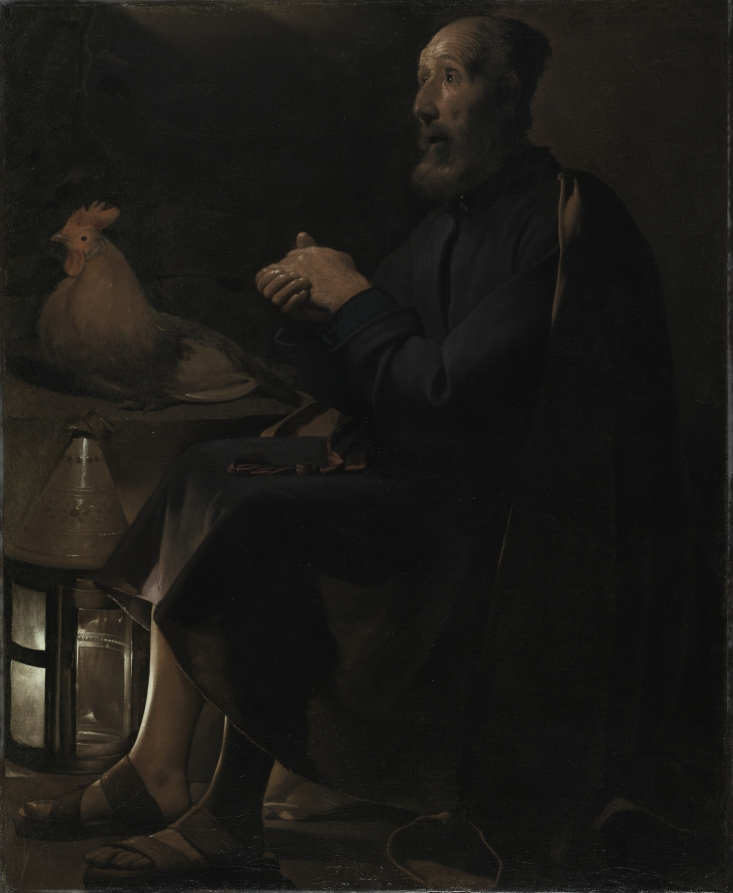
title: Saint Peter Repentant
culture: France, 17th century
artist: Georges de La Tour (French, 1593–1652)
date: 1645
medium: oil on canvas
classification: Painting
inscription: signed upper right: Georgs delaTour Invet et Pin / 1645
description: During Jesus’s arrest on the night of the Last Supper, the apostle Peter denied knowing him. Although Christ forgave his betrayal, Peter was consumed by guilt. Georges de La Tour represents Peter as an old man, reflecting on his past actions in a state of perpetual repentance. The apostle’s red-rimmed eyes and the uncertain light of the lantern suggest anxious sleepless nights; muted colors and simple forms give visual expression to Peter’s somber emotions. Unlike other artists inspired by Caravaggio, La Tour worked in relative isolation in northeastern France, and his connection to his Italian counterpart remains unclear.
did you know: The rooster next to Peter is a reference to Jesus's prediction that Peter will betray him, stating: "Before the rooster crows, you will disown me three times."